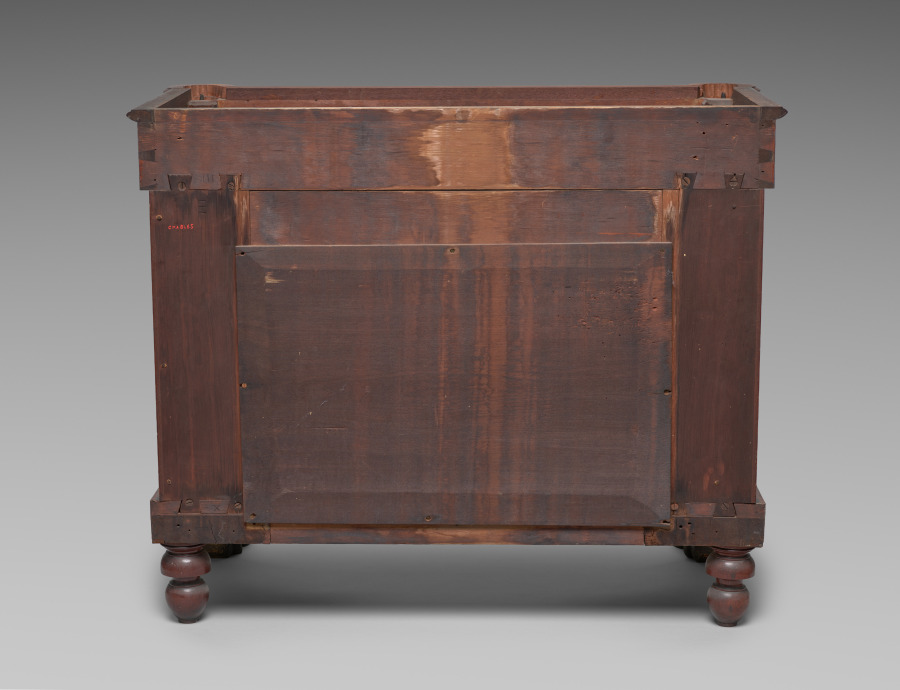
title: Pier Table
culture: America, New York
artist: Joseph Meeks and Sons (American)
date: c. 1829–35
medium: mahogany; marble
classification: Furniture and woodwork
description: Ornamental tables such as this marble-topped example were most often used in rooms on a narrow wall between two windows or just across from them on an opposite wall. Usually a gilded mirror hung above the table to create a single pier of glass, top to bottom, which reflected light around the room. This table’s bold use of carved and stenciled decoration, as well as expensive white marble, indicate that it was owned by a very wealthy family.